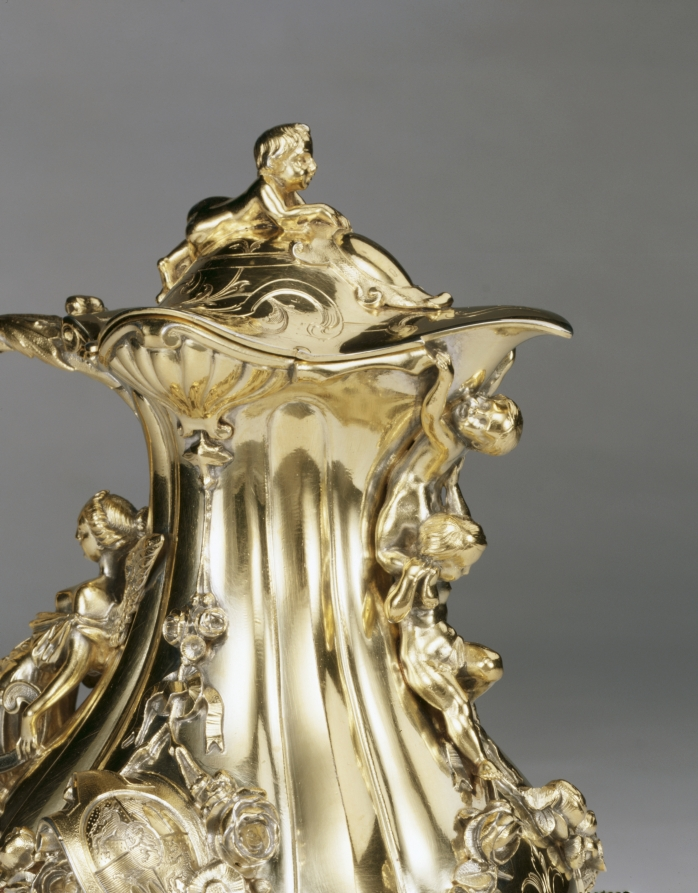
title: Covered Jug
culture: France, 19th century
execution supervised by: Jean-Valentin Morel (French, 1794–1860)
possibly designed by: Jules Dieterle (French, 1811–1889)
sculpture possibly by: Jules Klagmann (French, 1810–1867)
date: c. 1845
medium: gilded silver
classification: Silver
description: The elegance and richness of this ewer demonstrate the high level of technical mastery achieved by its maker. Morel studied under his father, a Parisian lapidary (someone who cuts, polishes, and engraves hard stones), and with Adrien Vachette, a maker of gold boxes. In 1842 he went into partnership with Charles-Edmond Duponchel, which lasted until the late 1840s, at which time he established himself in London, remaining there until 1852, when he returned to Paris. Morel frequentlyfollowed the designs of others, and it has been suggested that in the case of this pitcher his well-known contemporary, Jules Dieterle (1811-1889), may have conceived the overall form. The female figure seems to have been based on a design by the sculptor Jules Klagmann (1810-1867).